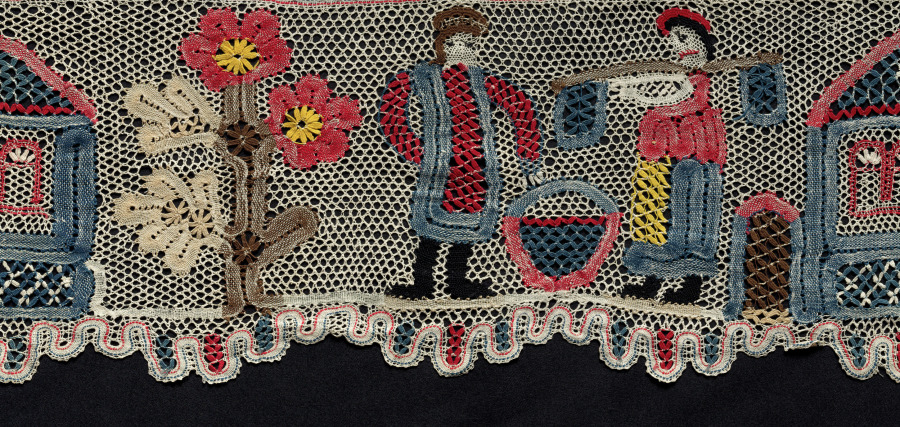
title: Figurative Border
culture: Russia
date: c. 1800–1899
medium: part (non-continuous) bobbin lace (tape lace)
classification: Lace